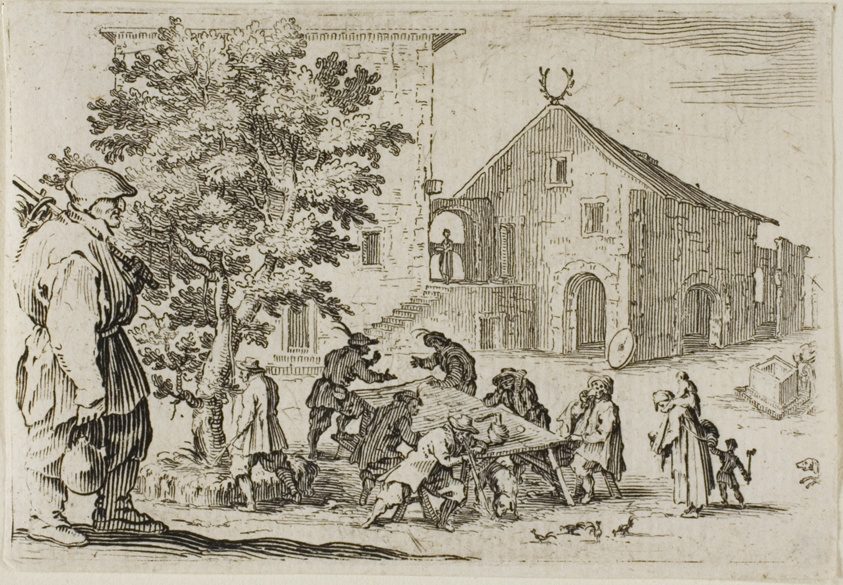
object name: Print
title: The Inn, from The Caprices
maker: Jacques Callot (French, 1592-1635)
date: c. 1622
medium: Etching on ivory laid paper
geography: France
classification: etching; print; prints and drawing